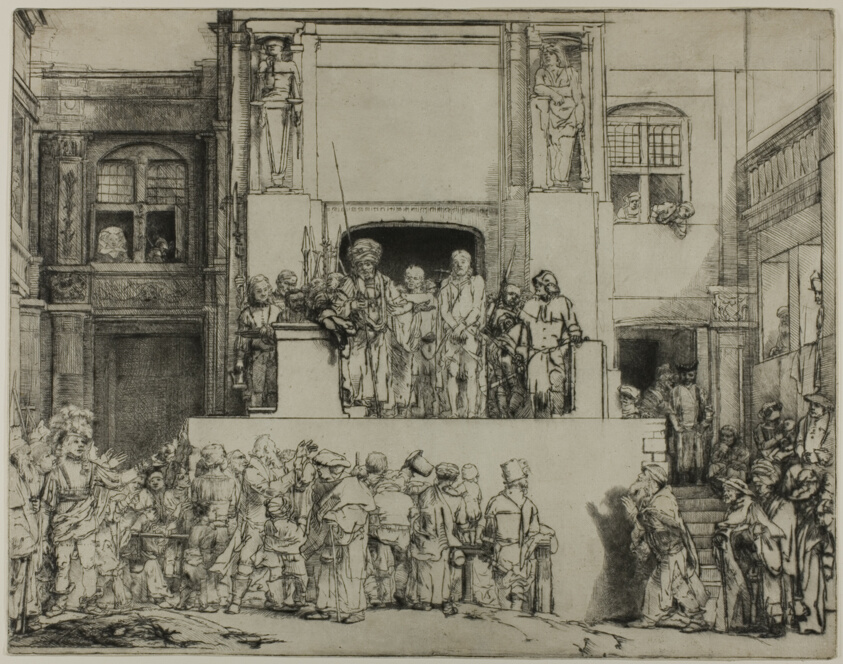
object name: Print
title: Christ Presented to the People: Oblong Plate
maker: Rembrandt van Rijn (Dutch, 1606-1669)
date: 1655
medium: Drypoint on ivory laid paper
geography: Holland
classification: drypoint; print; prints and drawing; paper